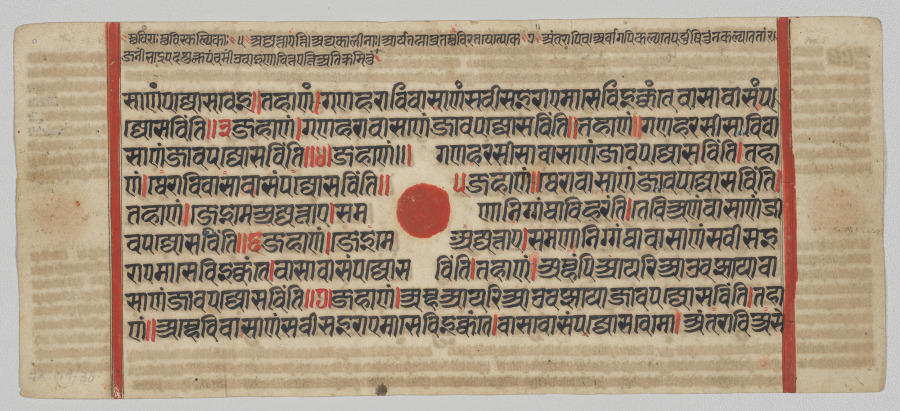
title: Text, Folio 67 (recto), from a Kalpa-sutra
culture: Western India, Gujarat, last quarter of the 15th century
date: c. 1475–1500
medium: Gum tempera, ink, and gold on paper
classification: Painting